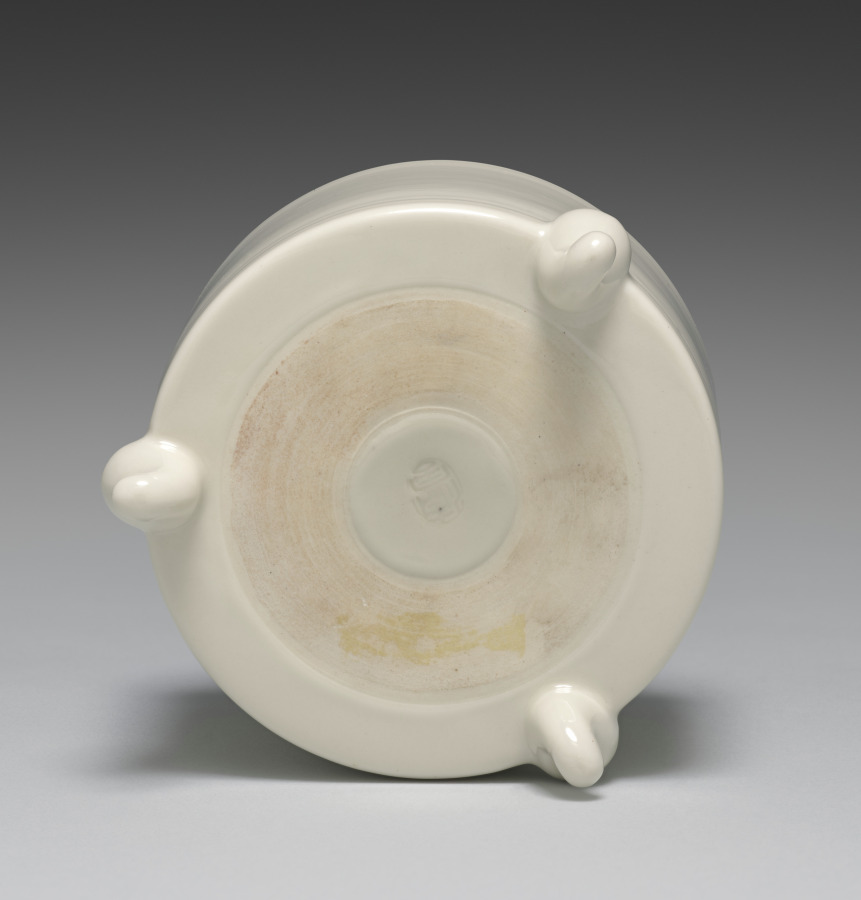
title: Incense Burner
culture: Japan, Meiji period (1868–1912)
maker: Seifū Yohei III (Japanese, 1851–1914)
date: 1893–1914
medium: Porcelain with creamy white glaze and molded design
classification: Ceramic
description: Yohei III made incense burners in a wide variety of designs and styles. The body and glaze of this one are taihakuji, or “great white porcelain,” an important early invention Yohei III devised in 1872 that involved the combination of a distinctive translucent, creamy glaze over an ivory-colored clay body. The burner has rounded, cabriole legs, resembling tiny table legs, attached to the exterior. Lids were produced outside the studio by metalwork specialists. For this incense burner, they created a floral-patterned silver lid.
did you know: There is the faintest decorative band around the bottom of the incense burner.